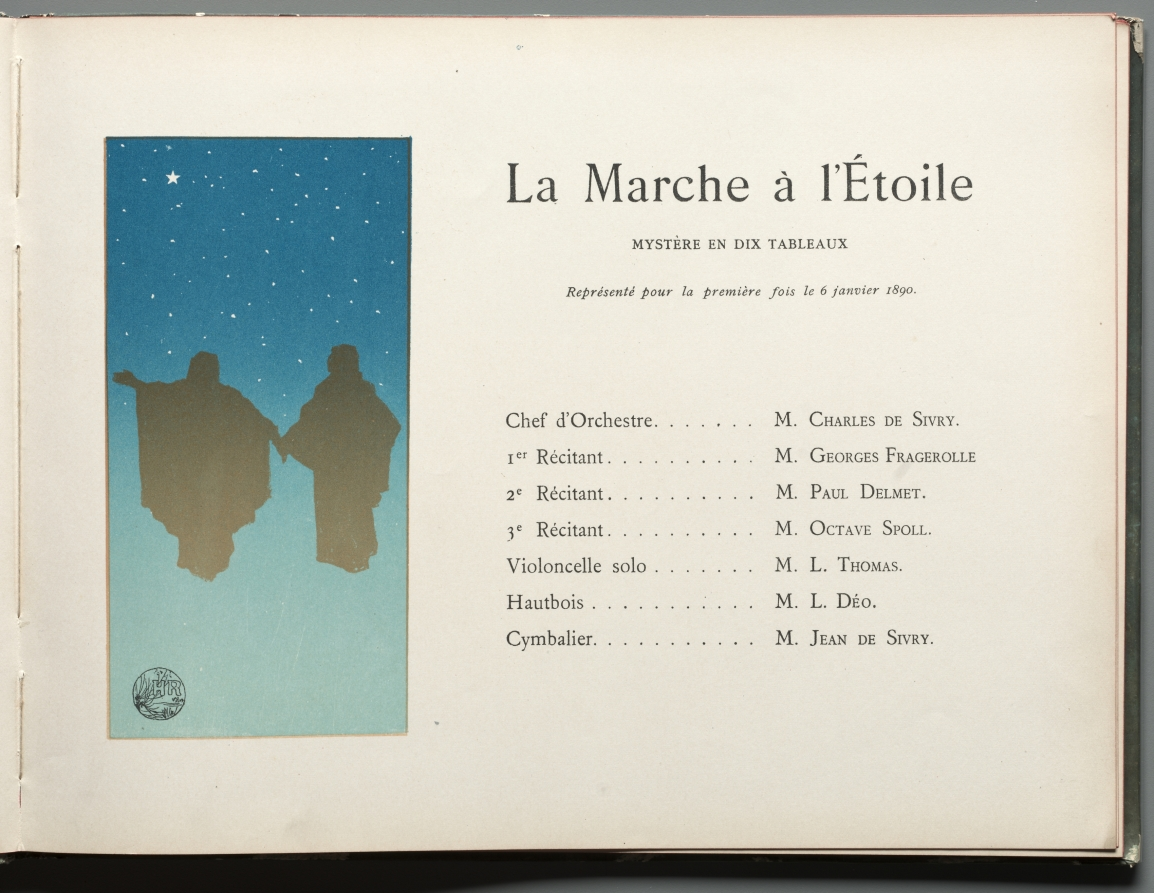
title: The Progress of the Stars: La Marche à l'Etoile Mystère en dix tableaux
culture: France, 19th century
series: Bound Volume illustrating the poetry and music of Georges Fragerolle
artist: Henri Rivière (French, 1864–1951)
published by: C. Marpon & Flammarion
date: 1890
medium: 18 color lithographs in a Bound Volume illustrating the poetry and music of Georges Fragerolle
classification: Bound Volume